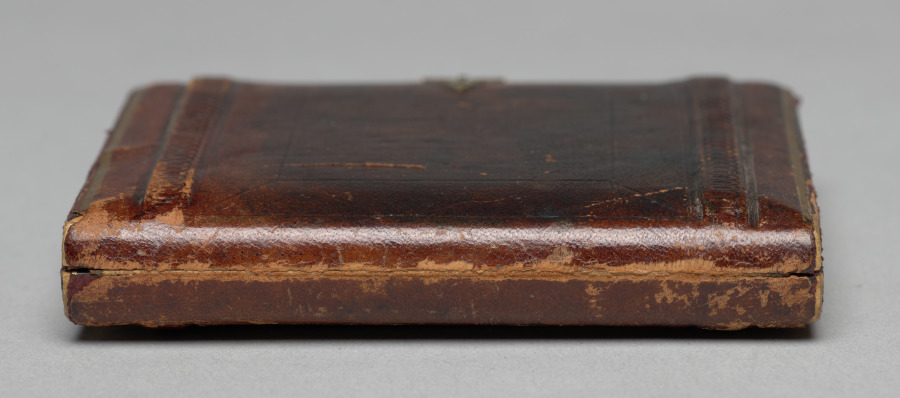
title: Miner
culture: America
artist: Robert H. Vance (American, 1825–1876)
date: c. 1853–55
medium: daguerreotype, sixth plate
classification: Photograph